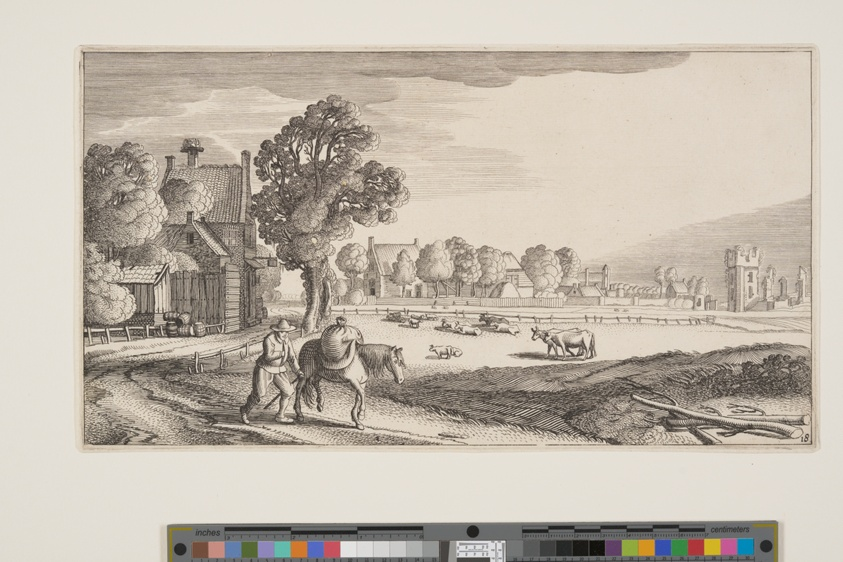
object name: Print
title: Roads along a Pasture, from Landscapes (Playsante Lantschappen)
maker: Attributed to Claes Jansz. Visscher II (Dutch, 1586-1652); after Jan van de Velde II (Dutch, c. 1593-1641)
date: c. 1641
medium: Etching, with engraving, on ivory laid paper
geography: Netherlands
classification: etching; paper; print; prints and drawing